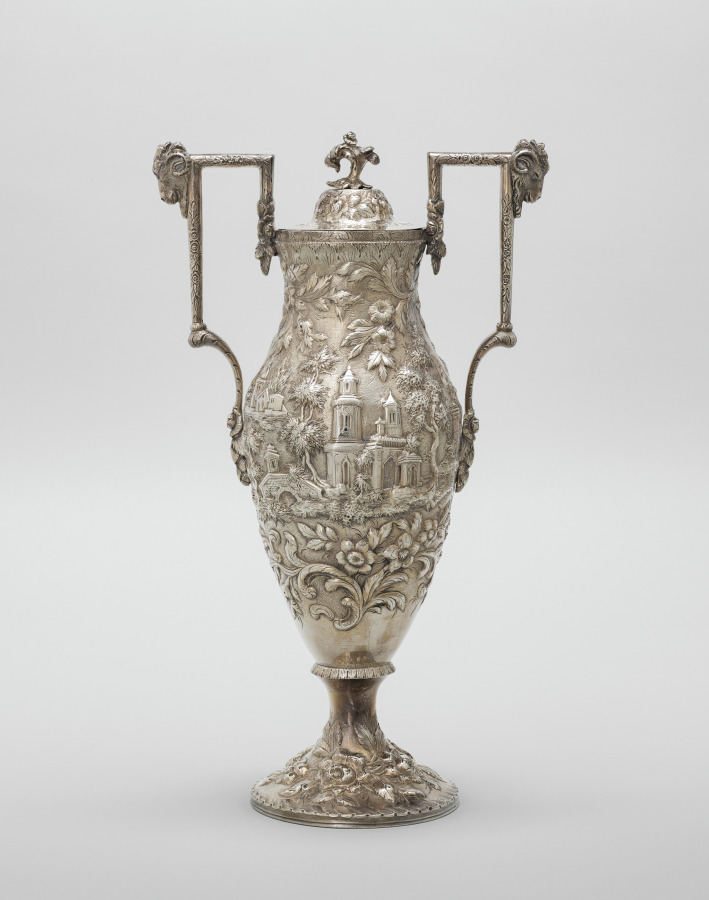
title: Coffee Urn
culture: America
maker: Samuel Kirk (American, 1793–1872)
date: c. 1843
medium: Silver, ivory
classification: Silver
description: Samuel Kirk was a leading American silversmith in the early 19th century whose Baltimore studio had became a major American silver company that thrived throughout the middle of the 20th century. Such a large, impressive coffee urn as this highly decorated example was considered the ultimate in Samuel Kirk silver and was largely made by hand.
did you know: The decoration on this coffee urn was achieved through a technique known as "repousse" in which the design was hammered into relief from behind.